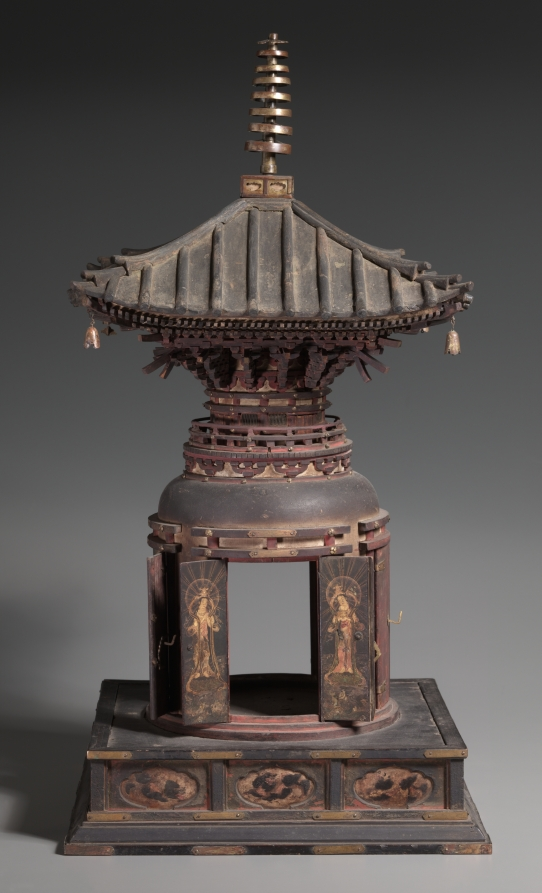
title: Many-Jeweled Stupa Reliquary (Tahōtō shari yōki)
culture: Japan, Kamakura period (1185–1333)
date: early to mid-1300s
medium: wood and metal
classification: Sculpture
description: Earthen mounds that marked the sites of interred relics in ancient India are called stupas. As Buddhism traveled through East Asia, the mounds took on the form of towers called “pagodas” by Westerners. This miniature tower, painted with Buddhist deities on the interiors of the doors on each side, likely once held items considered to be sacred relics. The deities on the doors have been tentatively identified as the four bodhisattvas of the sacred text the Lotus Sutra, and two Guardian Kings known as Niō.